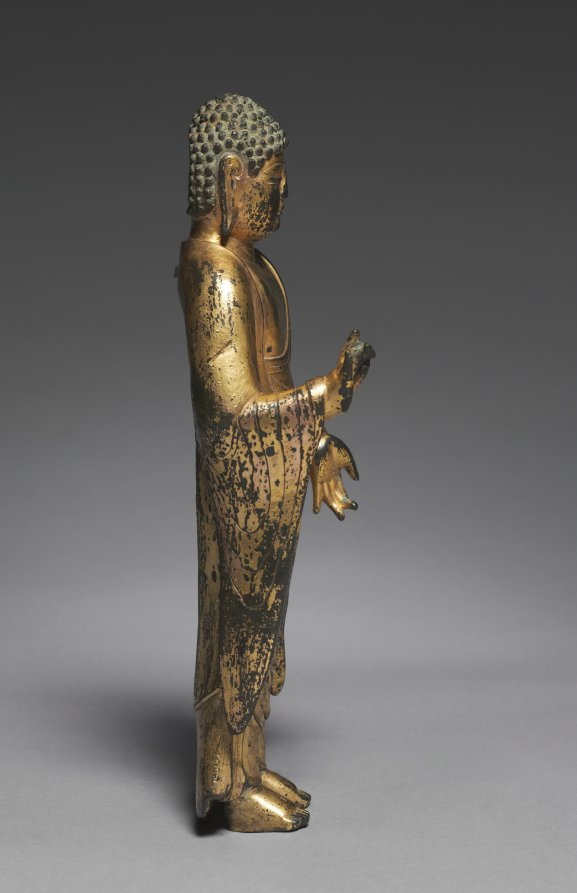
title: Standing Amitabha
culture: Korea, Unified Silla period (676-935)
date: 800s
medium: gilt bronze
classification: Sculpture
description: Buddhist teachings emphasize the pursuit of spirituality, rather than physicality, to achieve enlightenment. This statue’s artist, however, made genuine efforts to represent the divine’s beautiful voluminous body. Inspired by Indian Gupta period art (300s–500s CE), this particular artistic style emphasizing soft modeling and naturalism was further developed in China and flourished across East Asia.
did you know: This Korean statue has a stylistic affinity with statues from the Indian Gupta period (300s–500s CE) that emphasize soft modeling and naturalism.